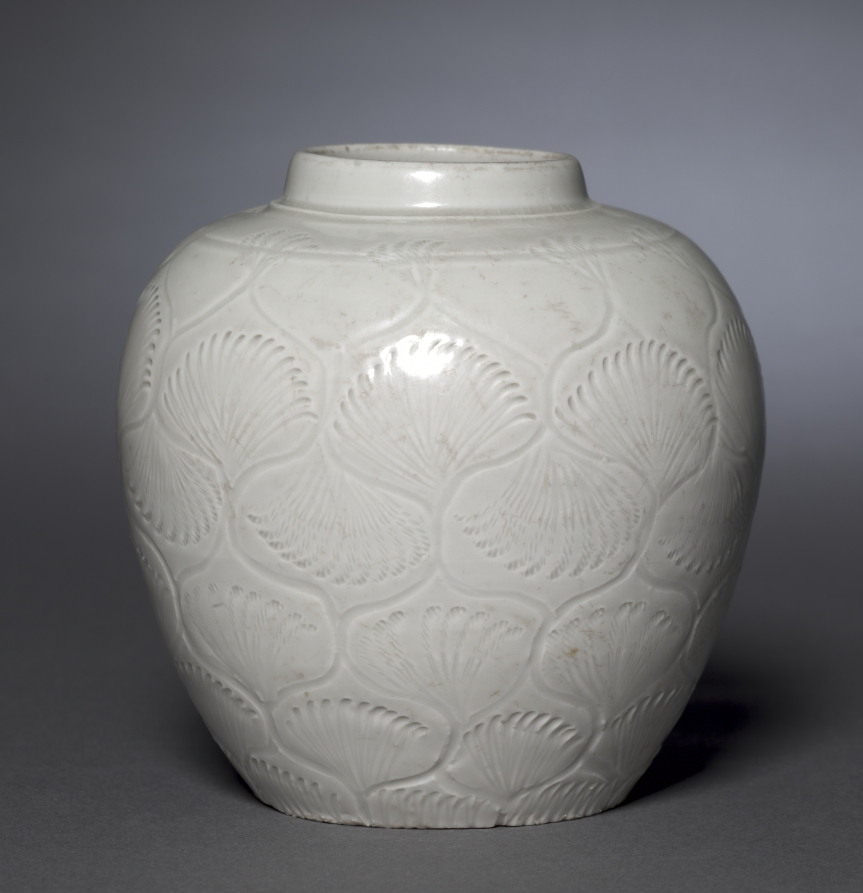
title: Jar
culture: Northeast China, Liao dynasty (916-1125)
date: 900s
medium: white porcelain with combed and incised decoration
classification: Ceramic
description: This finely potted vessel has an off-white porcelain body covered with a transparent glaze, giving an overall warm white color. A lattice of foliage patterns is combed and incised in the clay; the bold, uninhibited decoration interacts with the compact ceramic form and the subtle glazing to give it a special aesthetic appeal.